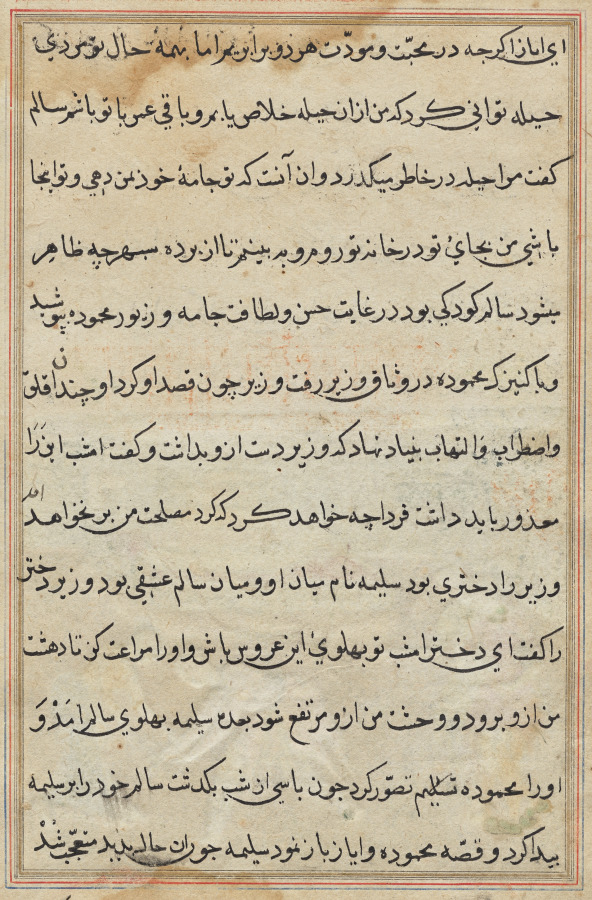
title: Page from Tales of a Parrot (Tuti-nama): text page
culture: Mughal India, court of Akbar (reigned 1556–1605)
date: c. 1560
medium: gum tempera, ink, and gold on paper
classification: Painting